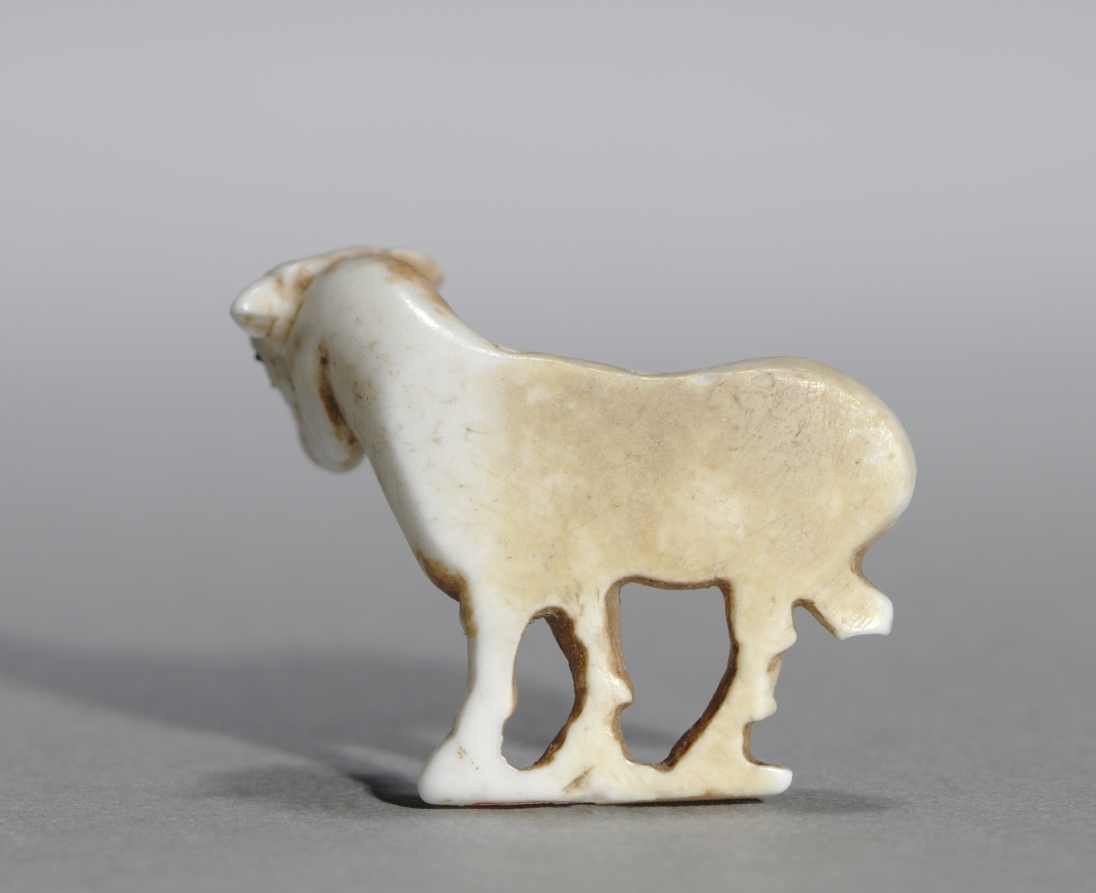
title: Striding Goat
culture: Sumerian, Iraq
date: c. 3200–3000 BCE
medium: limestone and Egyptian blue inlay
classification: Sculpture